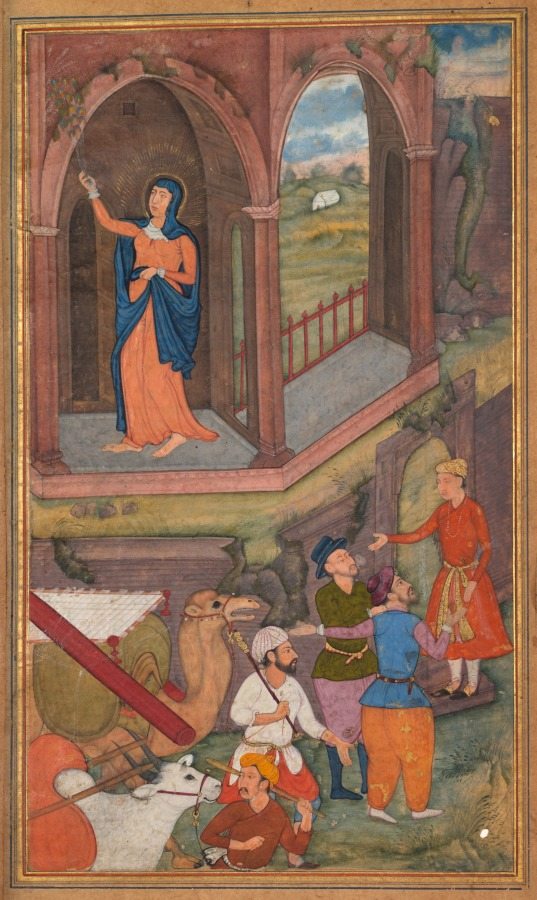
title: The place of Jesus’s birth (folio 25 recto), from a Mirror of Holiness (Mir’at al-quds) of Father Jerome Xavier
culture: Mughal India, Allahabad, made for Prince Salim (1569–1627)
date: 1602–4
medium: Gum tempera, ink, and gold on paper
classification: Manuscript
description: Instead of a stable, the artist has interpreted the place of Jesus’s birth as an abandoned ruin. Mary is cleaning it with a peacock-feather whisk, while Joseph negotiates with a man dressed in full Mughal attire at the doorway. The camel is laden with belongings and an Indian-style bed.